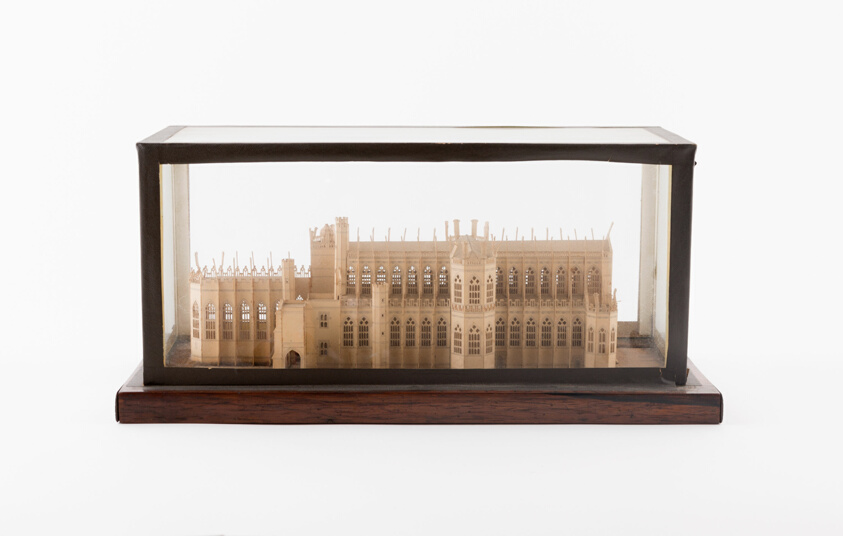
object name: Furniture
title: Model of Westminster Hall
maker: London, England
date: c. 1830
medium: Paper, wood, and glass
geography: England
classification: papier découpé; paper; european decorative arts; furniture